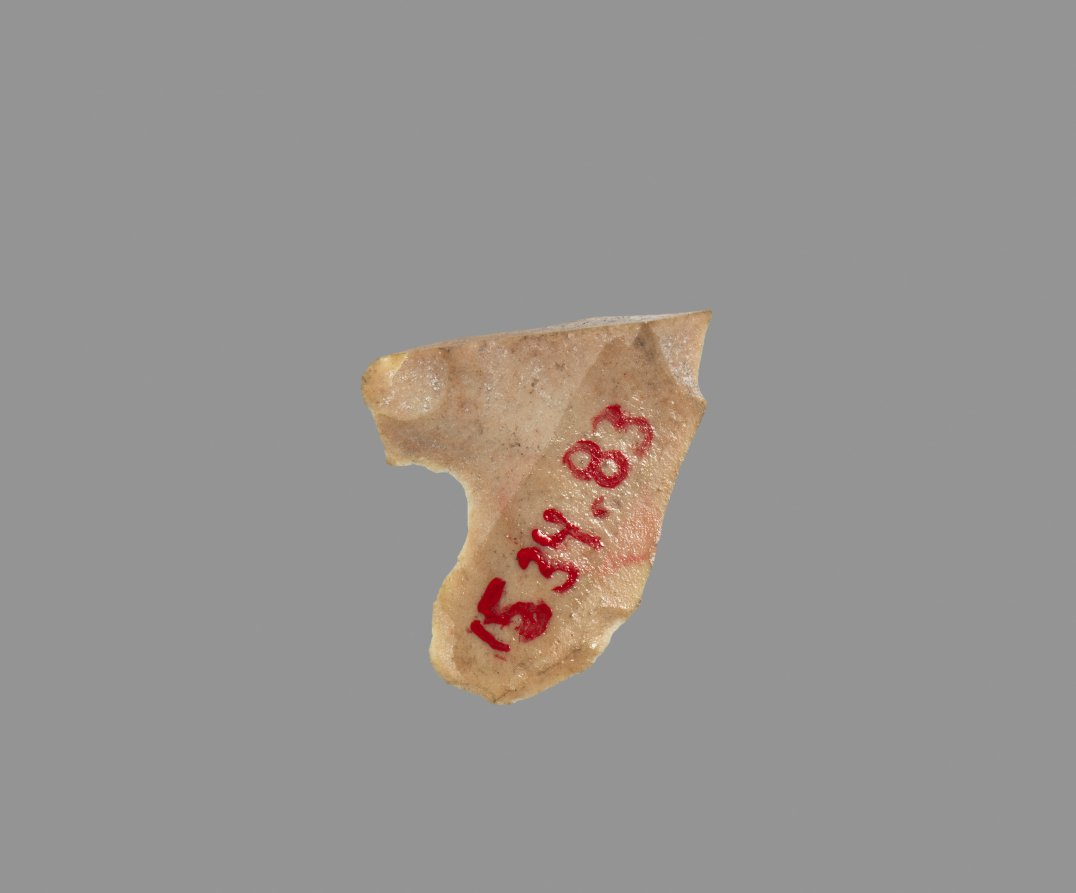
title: Sickle Blade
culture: Egypt, Middle Kingdom (2040–1648 BCE), Dynasty 12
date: 1980–1801 BCE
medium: flint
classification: Implements